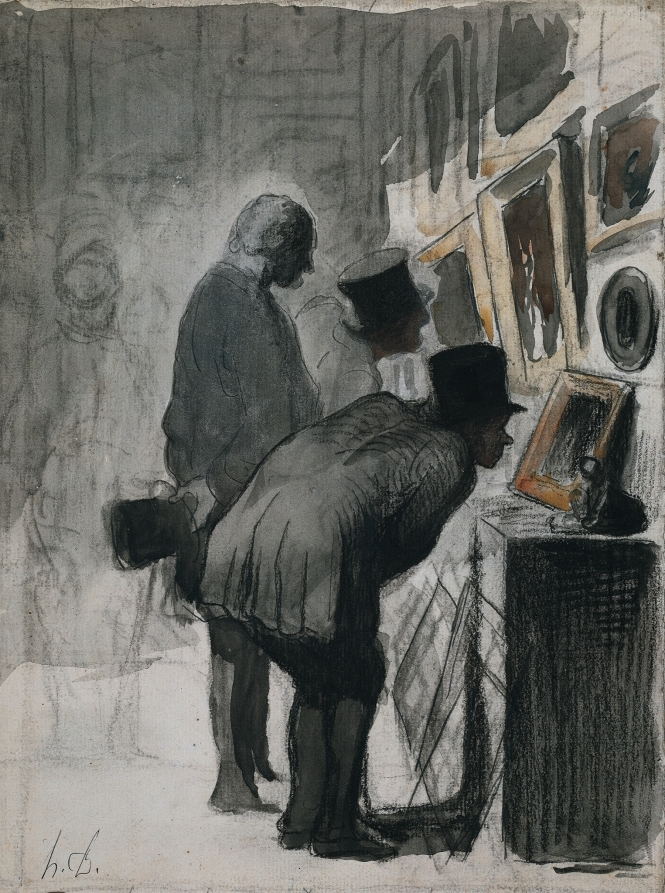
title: Art Lovers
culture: France, 19th century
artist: Honoré Daumier (French, 1808–1879)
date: c. 1863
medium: Gray and black wash, charcoal, and graphite, with watercolor, on cream laid paper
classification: Drawing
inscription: signed, lower left, in black ink: h.D.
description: Honoré Daumier was known for his witty depictions of contemporary Parisian types, including the art collectors seen in this drawing. The sheet belongs to a series in which the artist depicted these connoisseurs in the process of closely studying works of art. Although here, the men's focus seems sincere, in many works Daumier caricatured his subjects' greediness, smugness, or obliviousness.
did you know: Honoré Daumier produced watercolors primarily for collectors of his work, suggesting that this image, somewhat ironically, was intended to be sold to the very figures it depicts.